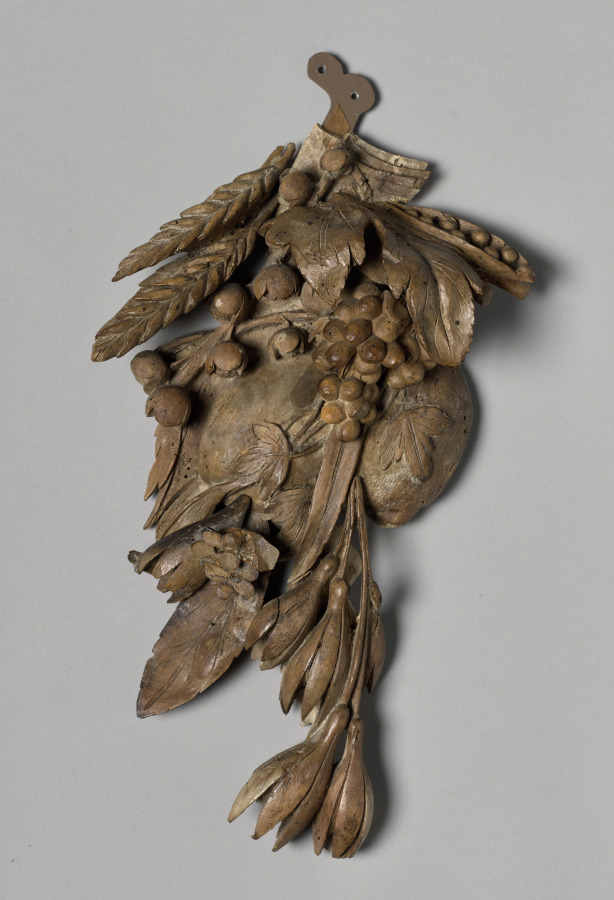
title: Carving from an Overmantel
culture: England, 17th century (Charles II)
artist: Grinling Gibbons (British, 1648–1721)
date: c. 1675–1677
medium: lindenwood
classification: Sculpture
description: The arrangement of architectural elements within grand interior spaces in the late 1600s and early 1700s emphasized symmetry and height. Decorative elements such as elaborately carved mantels, mirrors, paintings, and applied wall decorations were often stacked to achieve a visual focal point at one or both ends of the room. This particular overmantel decoration once hung above the fireplace in the Green Drawing Room of the Earl of Essex at Cassiobury in Watford, near London. In 1823, the British painter William Henry Hunt (1790–1864) produced a watercolor of the drawing room which featured this overmantel decoration. Grinling Gibbons was born in Rotterdam, the Netherlands, of English parents. After training there as an artist, he came to England in the 1660s and soon began to work as a sculptor of interior ornament, particularly in wood. One of his first large-scale decorative projects was the series of interiors at Cassiobury House.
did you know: The swags of fruit and foliage featured in this wooden overmantel decoration evoke the bounty of the English countryside.